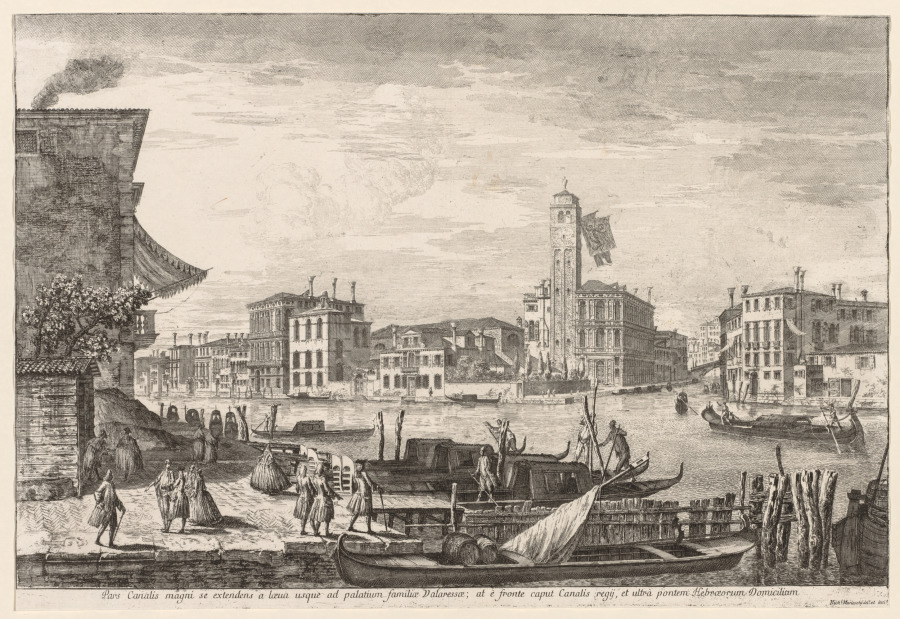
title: Views of Venice: Cannaregio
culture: Italy, 18th century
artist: Michele Marieschi (Italian, 1710–1743)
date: 1741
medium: etching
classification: Print